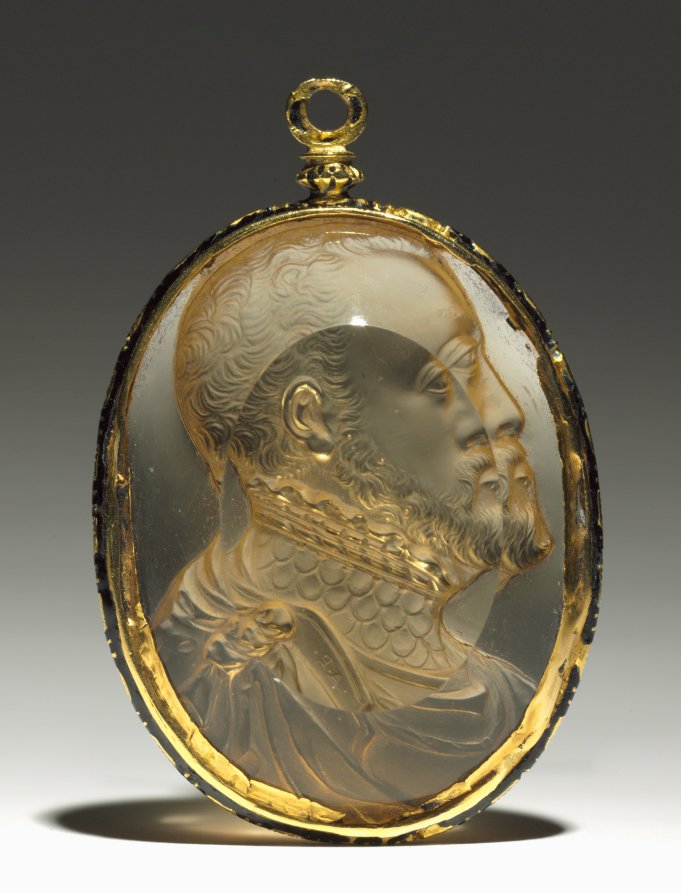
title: Portrait of Philip II, King of Spain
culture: Italy, 16th century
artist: Alessandro Cesati (Italian, before 1538-after 1564)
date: mid-1550s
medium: citrine, mounted in a gold and enamel pendant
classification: Sculpture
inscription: Signed on collar .A.E. (Likely abbreviation for “ΑΛΕΞΑΝΔΡΟΣ ΕΠΟΙΕΙ”, or “Alexandros Epoiei,” which translates to “Alexander made [me / this].”)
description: Clad in armor, Philip II wears a chain with the Order of Golden Fleece around his neck. The remarkably precise and varied cutting describes the textures of cloth, metal, skin, and hair while presenting the king’s features with striking naturalism—complete with receding hairline and prominent chin—as well as conveying his forceful character. Carved gems were luxury arts of the highest order in the Renaissance, hotly collected and used as diplomatic gifts. The original patron is not yet known, but cameos played a prominent role at the Spanish court, where the royal family often hold gems of Philip II in their portraits. The yellow quartz, rare in the 1500s, probably came from a newly opened source in South America; this object is thus both a natural marvel and a masterful portrait. One of only three known works signed by the artist (his initials appear at miniscule scale on the collar just below the knot of cloth), this stone is also likely in its original setting.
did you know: The ancient Romans believed citrine, a type of quartz, offered protection against evil thoughts.